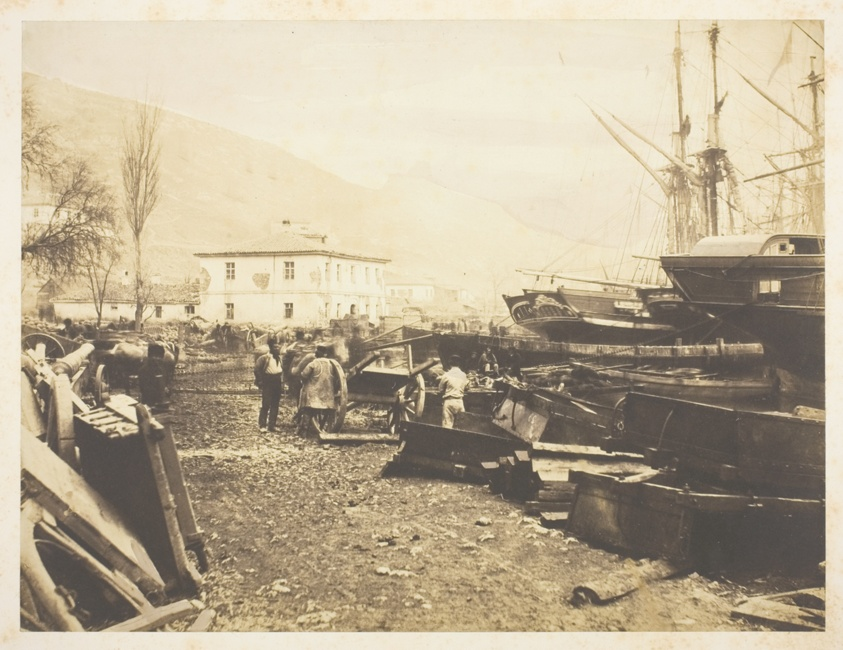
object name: Photograph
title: Landing Place, Ordnance Wharf, Balaklava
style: 19th century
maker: Roger Fenton (English, 1819–1869)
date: 1855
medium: Salted paper print, from the album "Photographic Pictures of the Seat of War in the Crimea" (1856)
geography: England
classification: salted paper print; photographic process; photography; photograph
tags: Collected by Hugh Edwards